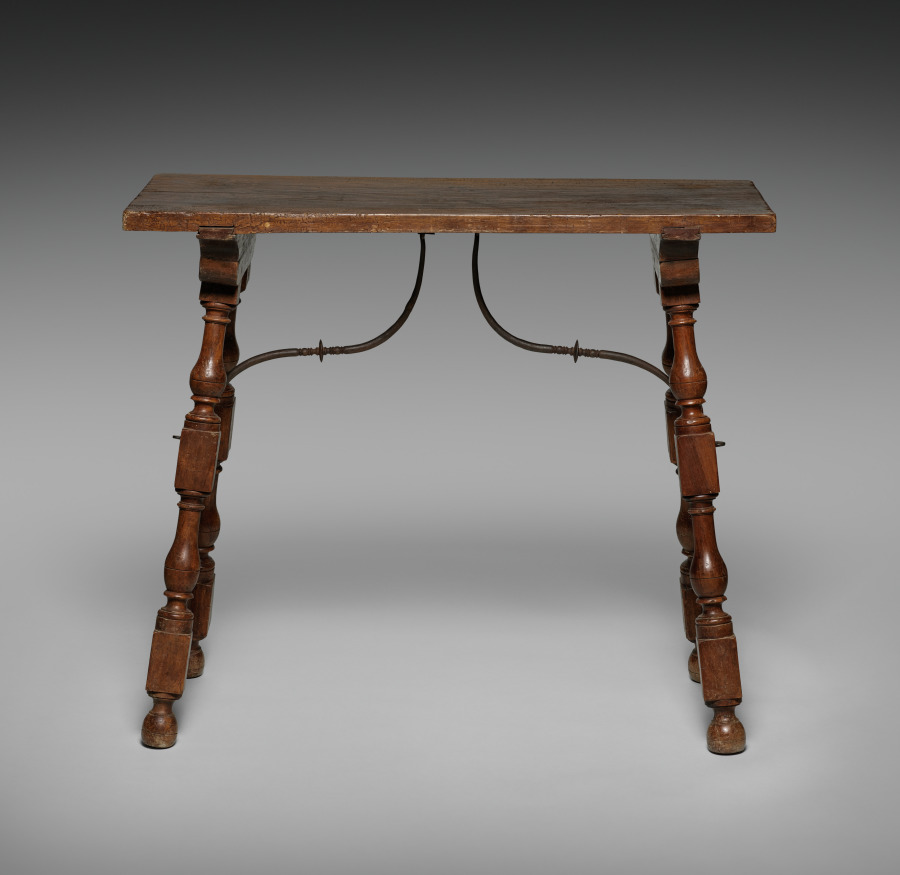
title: Chest (Base)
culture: Spain, Colonial, late 17th Century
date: late 1600s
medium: turned and joined wood with wrought iron hardware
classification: Furniture and woodwork